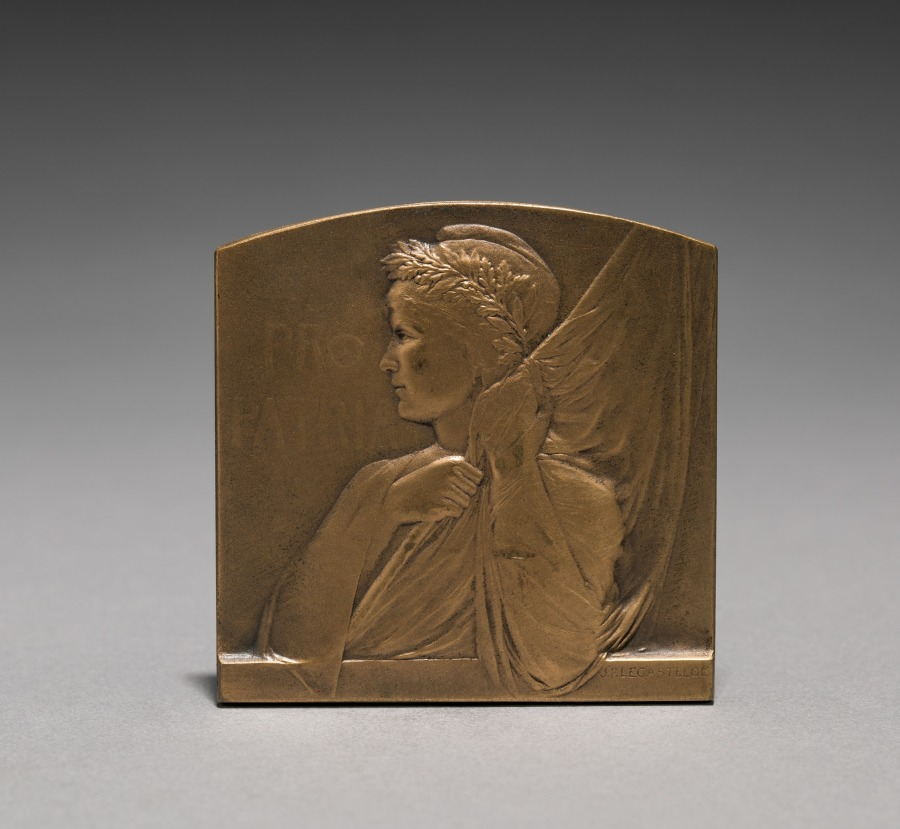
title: Medal (obverse)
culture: France, 19th century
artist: Jules Prosper Legastelois (French, 1855–1931)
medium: bronze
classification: Metalwork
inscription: "Pro Patria."